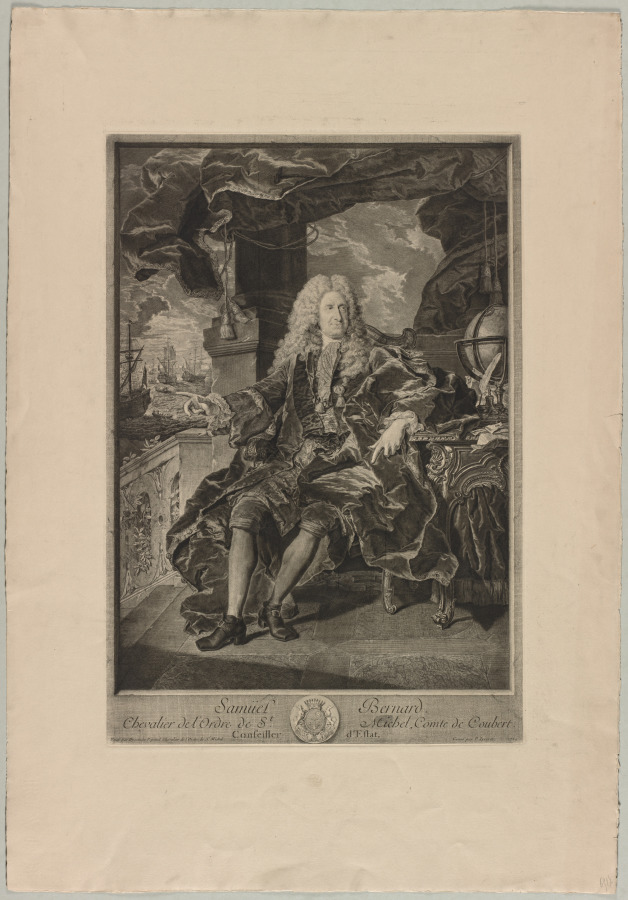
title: Samuel Bernard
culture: France, 17th-18th century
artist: Pierre Drevet (French, 1663–1738)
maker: after Hyacinthe Rigaud (French, 1659–1743)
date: 1729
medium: engraving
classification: Print